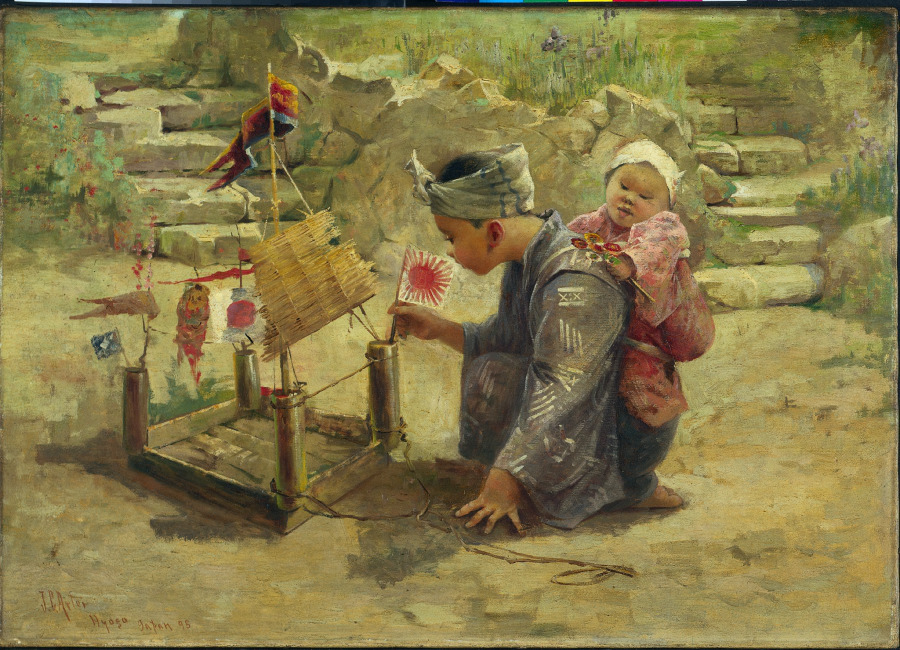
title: Japanese Boy Building a Man-of-War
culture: America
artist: J. C. Arter (American, 1859–1923)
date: 1895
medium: oil on canvas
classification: Painting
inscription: signed lower left: J. C. Arter / Hyozo / Japan 95